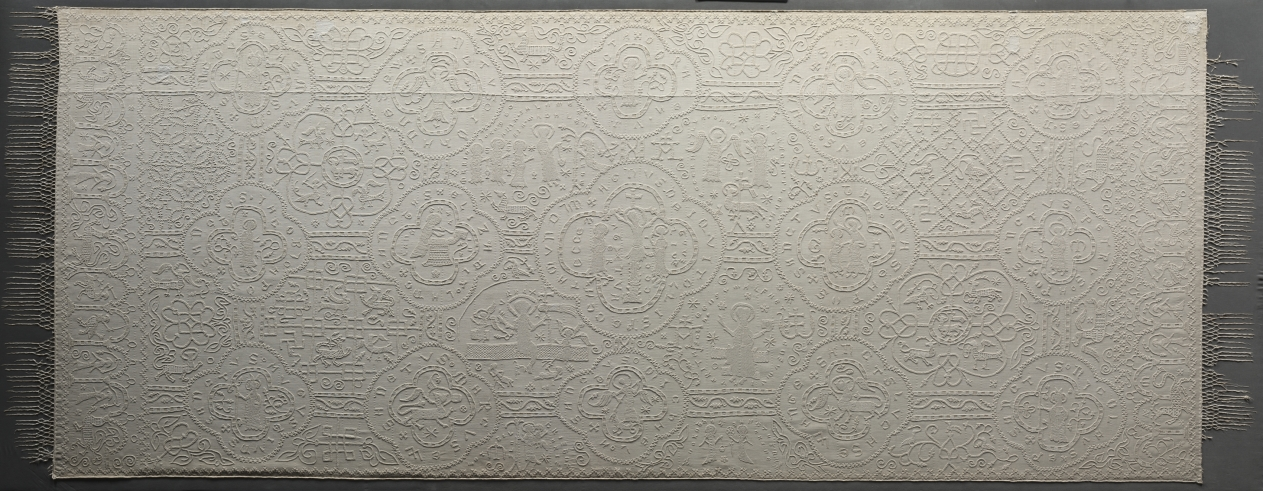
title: Altar Cloth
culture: Germany, Altenberg on the Lahn, Premonstratensian Convent, 14th century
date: c. 1350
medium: embroidery: linen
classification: Embroidery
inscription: various motifs enclosed in quatrefoils with identifying inscriptions in Gothic letters.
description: This large, embroidered altar cloth is one of the rarest, most important medieval church furnishings in existence. It was stitched by nuns in the Premonstratensian Convent in Altenberg on the Lahn River, north of Frankfurt, Germany, and was used to cover the church’s high altar in the weeks leading up to Easter. The cloth is an example of linen embroidery, a specialty of German nuns in the later Middle Ages. The Altenberg monastery church once had valuable furnishings; the high altar retable (a decorated frame with sculptures and paintings on the top of an altar) has survived, the main parts of which are now in the Städel Museum in Frankfurt, Germany.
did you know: When lit from behind, the previously hidden details emerge and the complex design becomes evident.